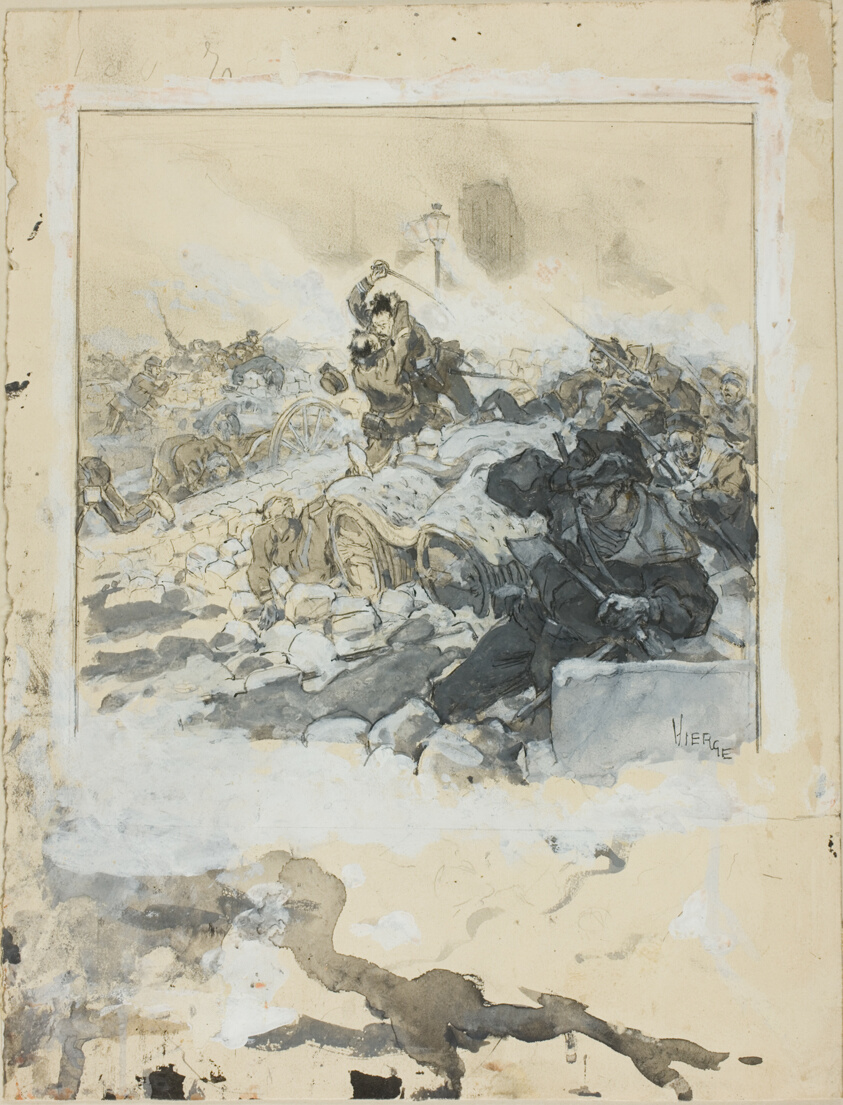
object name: Drawing and Watercolor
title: Scene from the Suppression of the Paris Commune in May, 1871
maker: Daniel Urrabieta Vierge (French, born Spain, 1851-1904)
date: c. 1871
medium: Pen and black ink and brush and gray gouache, with brush and gray wash and graphite, heightened with lead white (discolored), on cream wove paper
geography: France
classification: gouache; drawings (visual works); prints and drawing